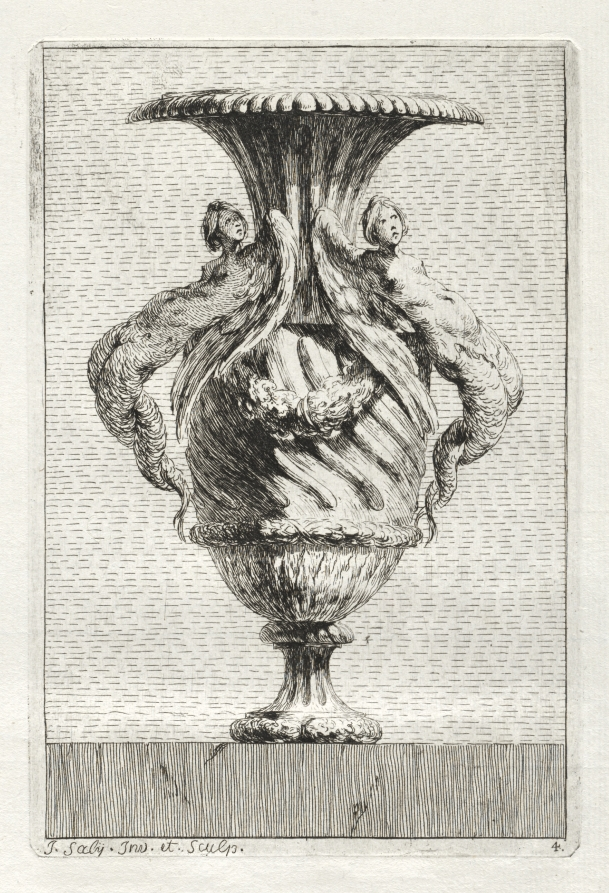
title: Suite of Vases: Plate 4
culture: France, 18th century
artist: Jacques François Saly (French, 1717–1776)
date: 1746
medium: etching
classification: Print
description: Designing ornamental vases or urns was particularly popular during the mid-18th century since the only limit to the possibilities was the imagination of the artist. Saly, a sculptor by training, was a student at the French Academy in Rome from 1740 to 1746, at which time he published a set of 30 etchings. Saly began with basic antique vase forms but deviated from classical ornament to use a rich variety of fantastic creatures for embellishment.